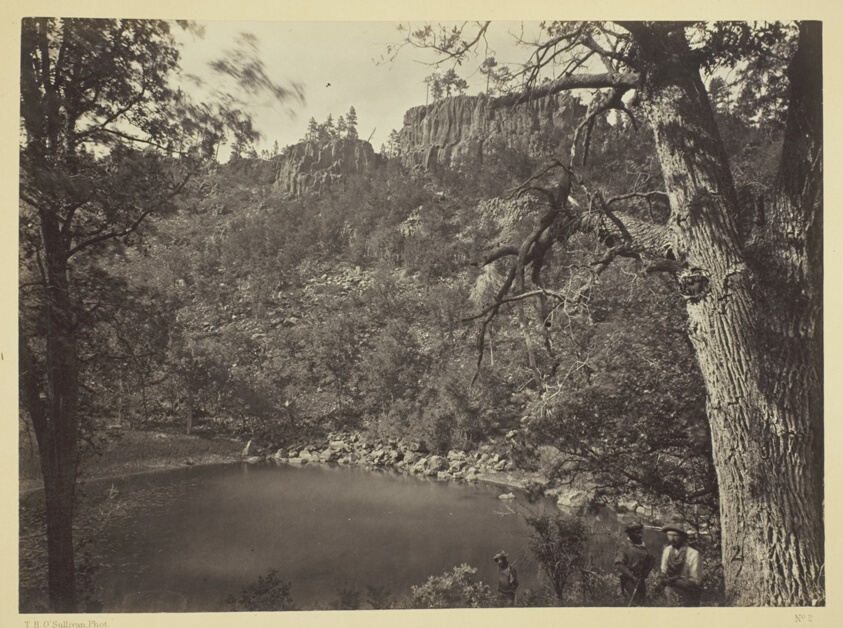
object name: Photograph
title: View on Apache Lake, Sierra Blanca Range, Arizona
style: 19th century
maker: Timothy O'Sullivan (American, born Ireland, 1840–1882)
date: 1873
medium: Albumen print, from the album "Geographical & Geological Explorations & Surveys West of the 100th Meridian," vol. 1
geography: United States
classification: albumen silver print; photographic process; photography; photograph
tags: Collected by Hugh Edwards